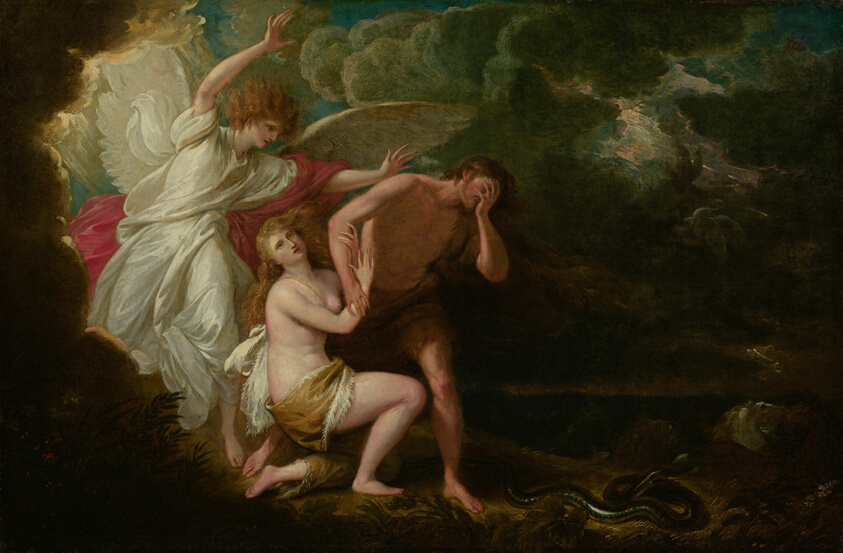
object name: Painting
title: The Expulsion of Adam and Eve from Paradise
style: 18th Century, nineteenth century, 19th century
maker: Benjamin West (British, born United States, 1738–1820)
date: 1791, retouched 1803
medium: Oil on canvas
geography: England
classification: oil on canvas; paint; oil paintings (visual works); british; painting; european painting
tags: Adam (Biblical), snake, sky, nudes, Eve (Biblical), clouds, biblical, animals, angels, garden, sketch